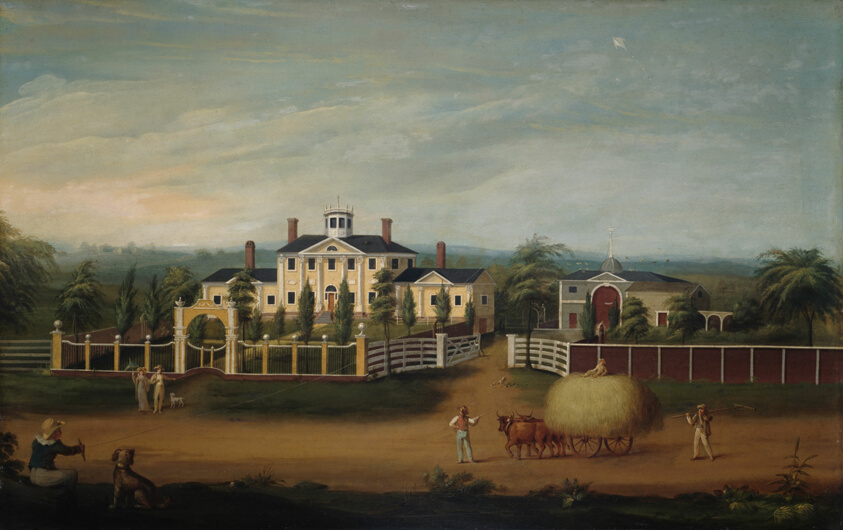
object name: Painting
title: New England Country Seat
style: Folk Art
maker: Artist unknown (American, 18th–19th century)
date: 1800–20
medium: Oil on yellow poplar panel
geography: New England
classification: painting; american arts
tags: landscapes, architecture